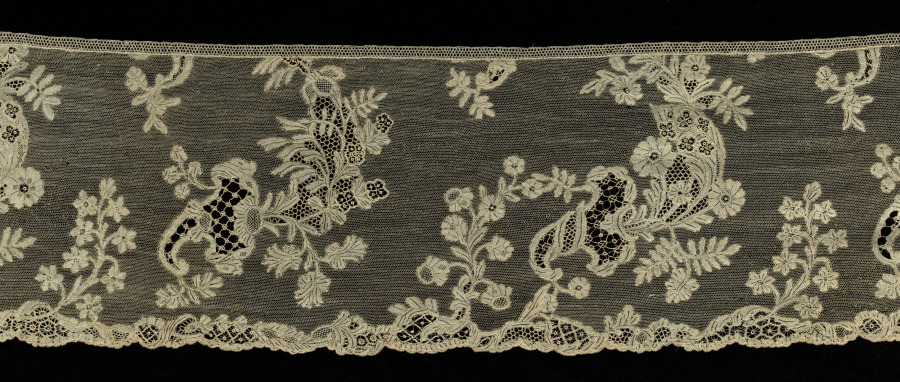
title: Lace Flounce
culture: Italy, Burano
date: 1700s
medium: Linen: needle lace (Burano Point)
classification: Lace